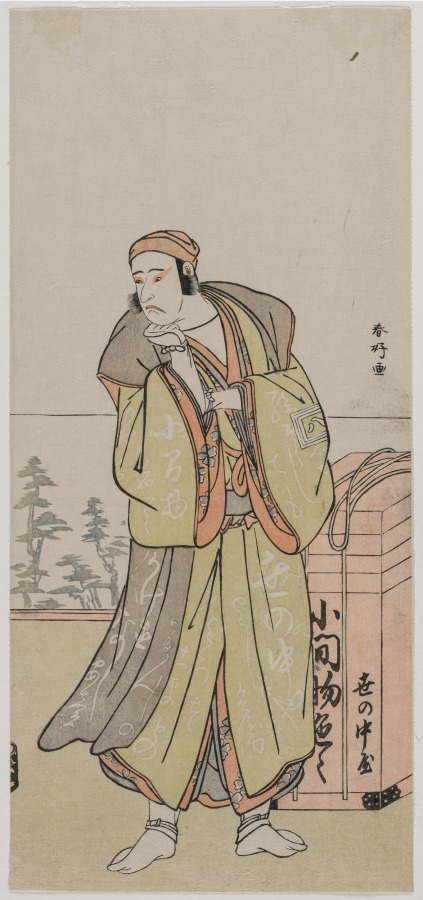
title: Ichikawa Yaozo II as an Itinerant Peddler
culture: Japan, Edo period (1615–1868)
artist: Katsukawa Shunkō (Japanese, 1743–1812)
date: mid or late 1770s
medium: color woodblock print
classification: Print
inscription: Signature: Shunko ga